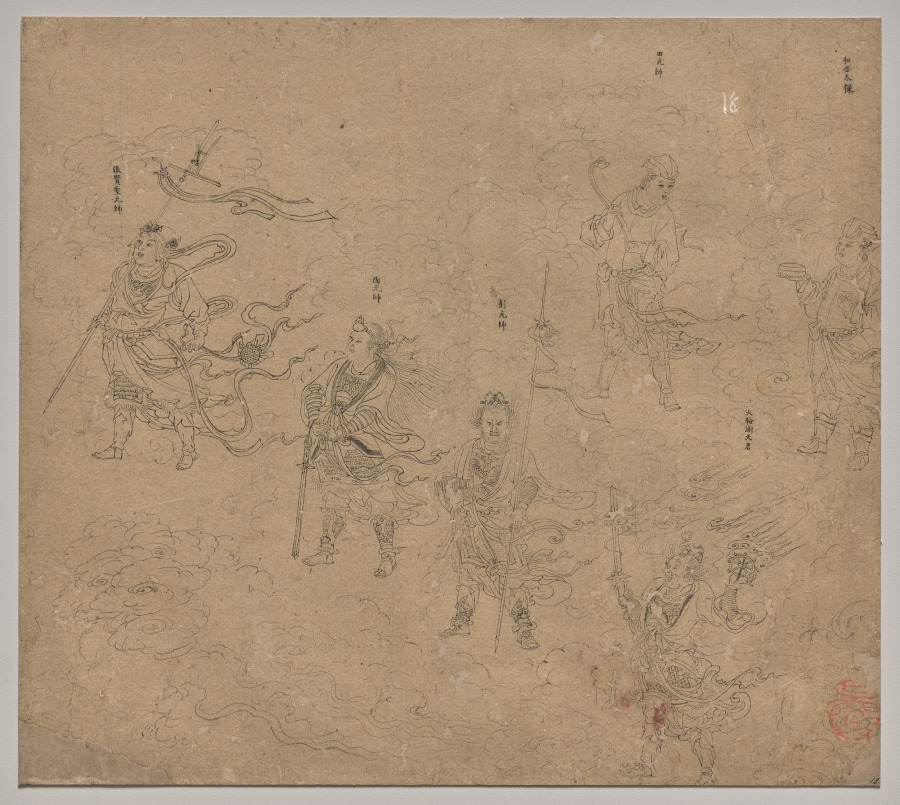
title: Album of Daoist and Buddhist Themes: Procession of Daoist Deities: Leaf 15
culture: China, Southern Song dynasty (1127-1279)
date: 1200s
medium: Album, ink on paper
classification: Painting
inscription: 和合太保; 火輪謝天君; 田元帥; 彭元帥; 陶元帥; 張賢聖元帥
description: Four Field Marshals of the Daoist pantheon dressed in military garb are, from right to left, Tian 田元帥, Peng 彭元帥, Tao Yuanxin 陶元信, and Zhang Xiansheng 張賢聖. Hehe Grand Guardian 和合太保 and Heavenly Lord Xie Shirong 謝仕榮 in the upper row are each more simply dressed in a cap and robe tied at the waist.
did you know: Hehe Grand Guardian 和合太保 holds a ruyi scepter.